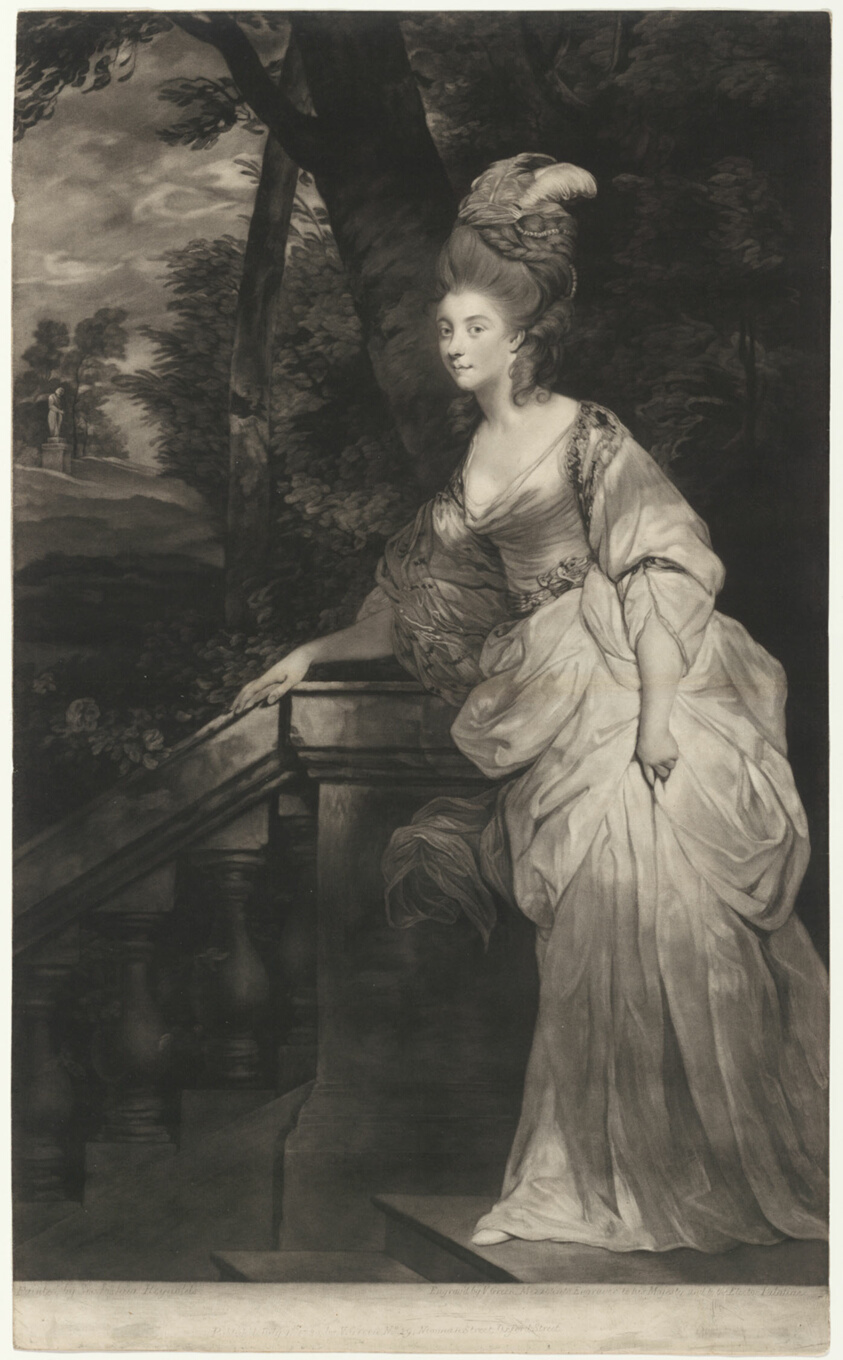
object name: Print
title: Georgiana, Duchess of Devonshire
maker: Valentine Green (English, 1739-1813); after Sir Joshua Reynolds (English, 1723-1792)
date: 1780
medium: Mezzotint on paper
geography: England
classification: mezzotint; print; prints and drawing